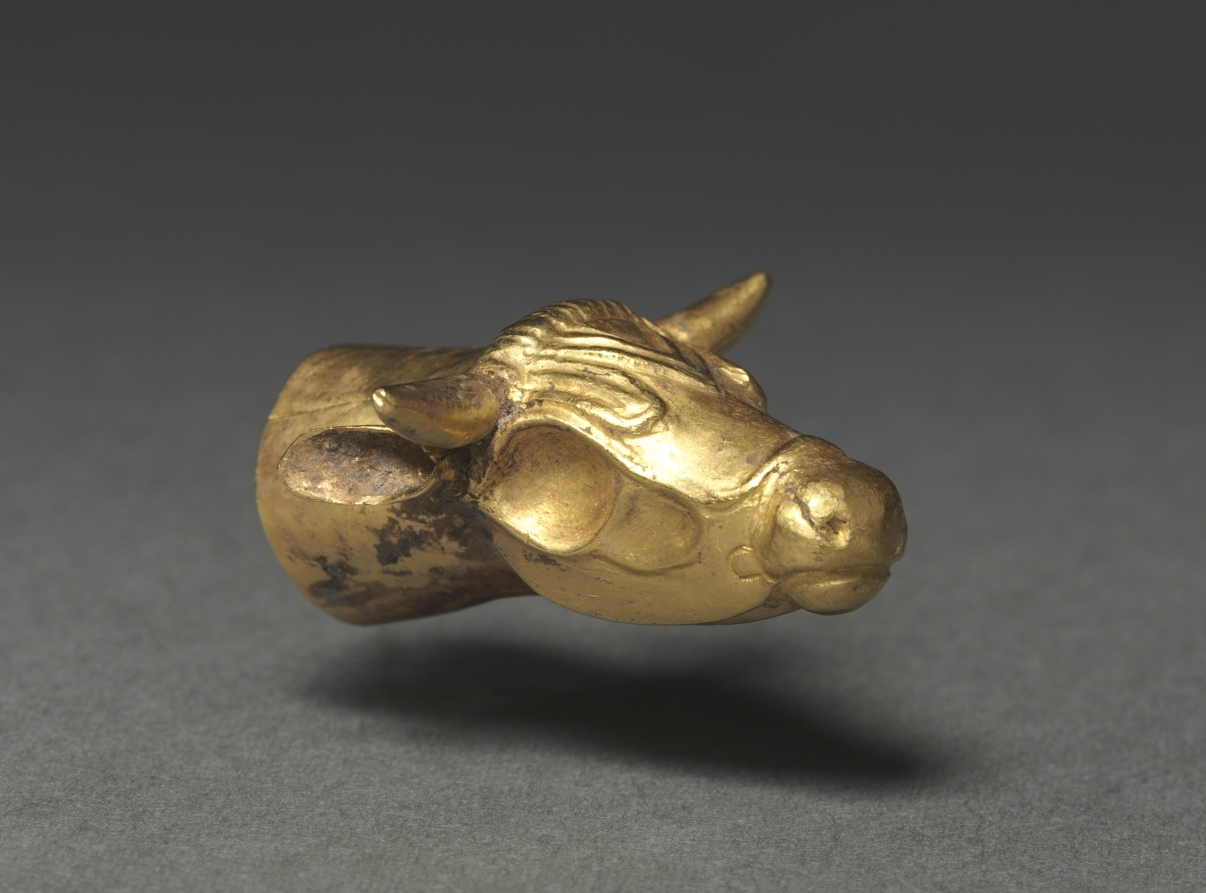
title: Bovine Finial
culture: Greece or Turkey, Thracian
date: 400–300 BCE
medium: gold, hammered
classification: Sculpture